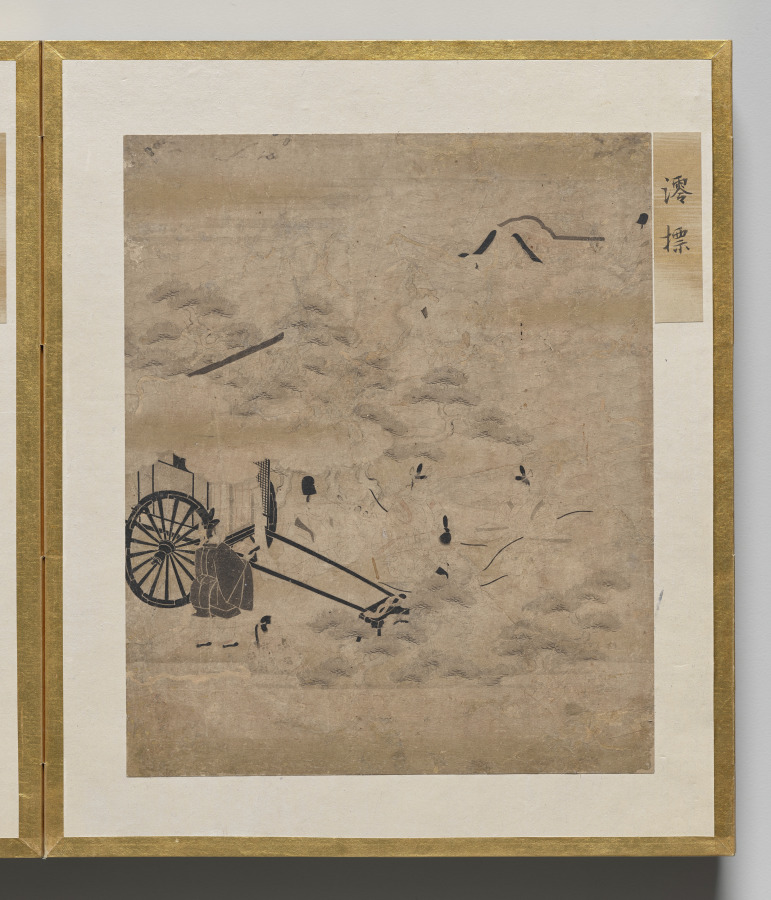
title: Channel Buoys from Album of Illustrations for the Tale of Genji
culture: Japan, Edo period (1615–1868)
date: 1600s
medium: painting in an accordion-style album; ink, light color, and gold on paper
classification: Bound Volume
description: This album contains illustrations for the classic literary work the Tale of Genji, authored in the 1000s by Murasaki Shikibu, an aristocrat of the Heian period (794–1185) court. The scenes are painted in the “white drawing” (hakubyō) mode, in which a fine ink line is used to depict figures and spaces with great subtlety, punctuated only occasionally by traces of red pigment for a character’s lips, a detail of a garment, or a decorative element. These two scenes illustrate episodes from the chapters “Thin Veil of Cloud” (Usugumo) and “Barrier Gate” (Sekiya).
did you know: The illustrations are identified by chapter title in cartouches to the upper right of the paintings.